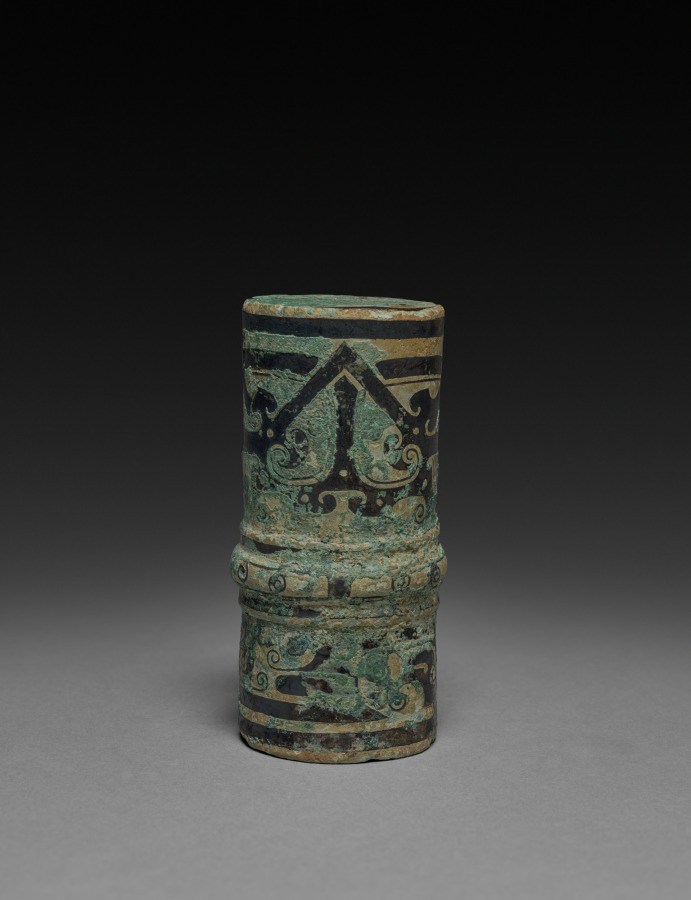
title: Shaft Mounting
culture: China, Eastern Zhou dynasty (770–256 BCE), Warring States period (475–221 BCE)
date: 500–300 BCE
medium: bronze inlaid with gold and silver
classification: Metalwork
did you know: This small circular finial is treated with whorls, angles, and horn- or beak-like parts that suggest either oxen or birds.